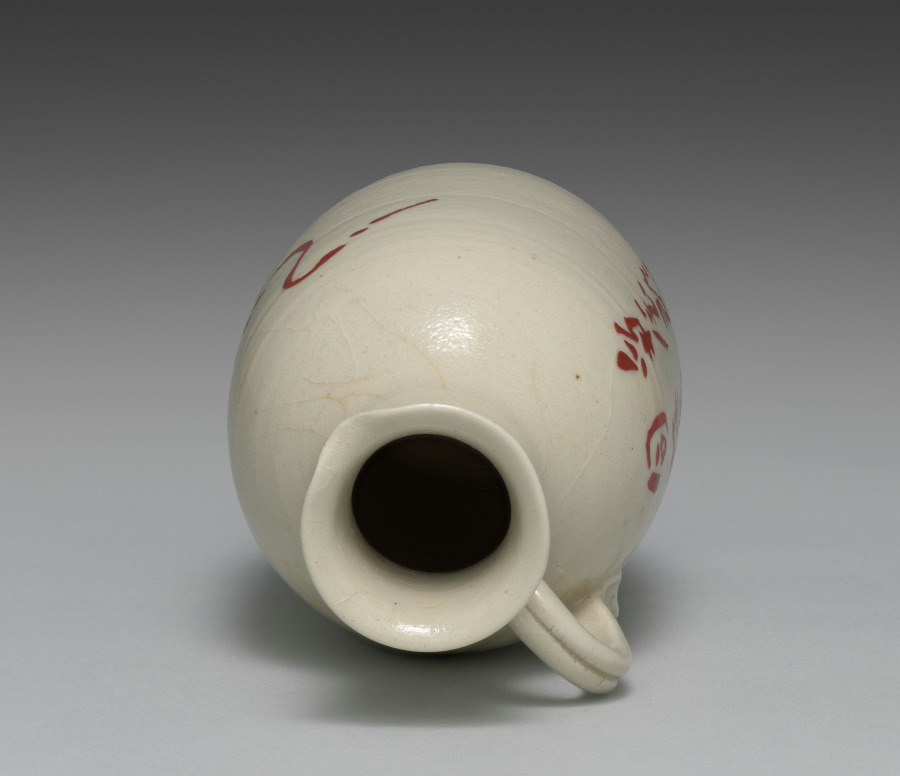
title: Crane Sake Pourer from Sake Pourers with Crane and Tortoises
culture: Japan, Meiji period (1868–1912)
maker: Seifū Yohei III (Japanese, 1851–1914)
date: 1893–1914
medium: One of a pair of sake flasks; porcelain with overglaze color enamel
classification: Ceramic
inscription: 爭食羣雞前，同遊者同志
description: This flask has a crane with a leg raised, while the other flask of this pair has stencil-like paintings of three turtles—a young one with its parents. Cranes and turtles are well-recognized symbols of longevity in East Asia, with the turtle said to live for ten thousand years and the crane for one thousand. Each flask also has a poem on the back, one in Chinese and the other in Japanese. The Chinese poem on this crane flask is two nonconsecutive five-character lines from a poem called “Crane Feelings” by the famous Tang dynasty poet Bai Juyi (772–846). One character in one of the lines has been altered. This creative poetic sampling results in a verse reading zheng shi qun ji qian, tong you zhe tong zhi 爭食羣雞前，同遊者同志. It could perhaps be translated, “before the flock of chickens competing for food, those traveling together have the same ambitions.”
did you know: This pair of seemingly humble sake pourers celebrate longevity and delight in a literary tradition that embraces multiple forms of poetic expression.